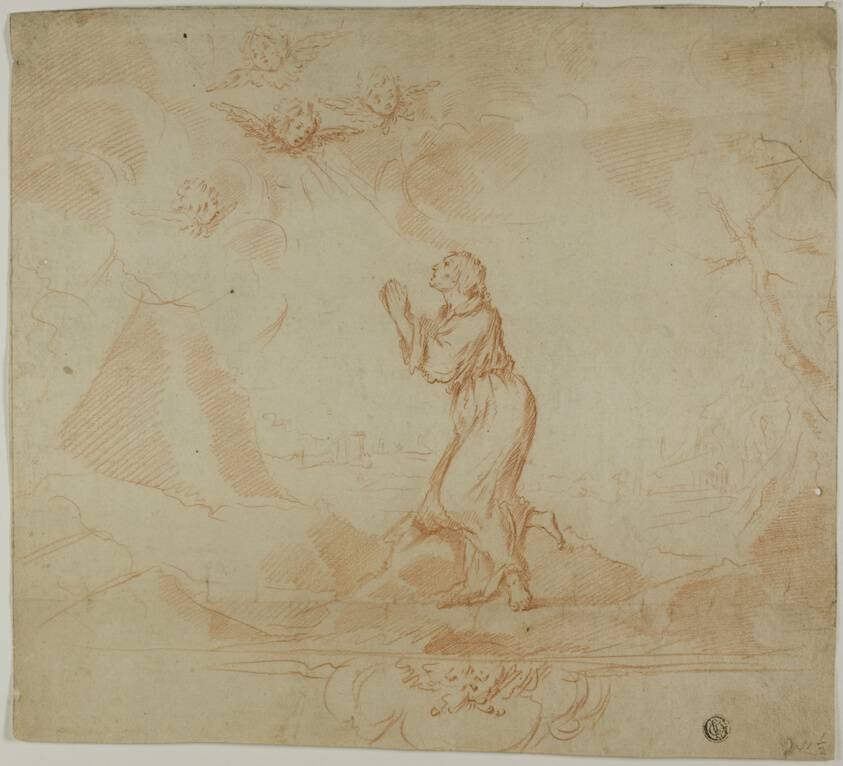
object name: Drawing and Watercolor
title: Woman in Ecstasy, and Putti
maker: Possibly after Donato Creti; Italian, 1671-1749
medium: Red chalk on ivory laid paper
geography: Italy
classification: chalk; drawings (visual works); prints and drawing